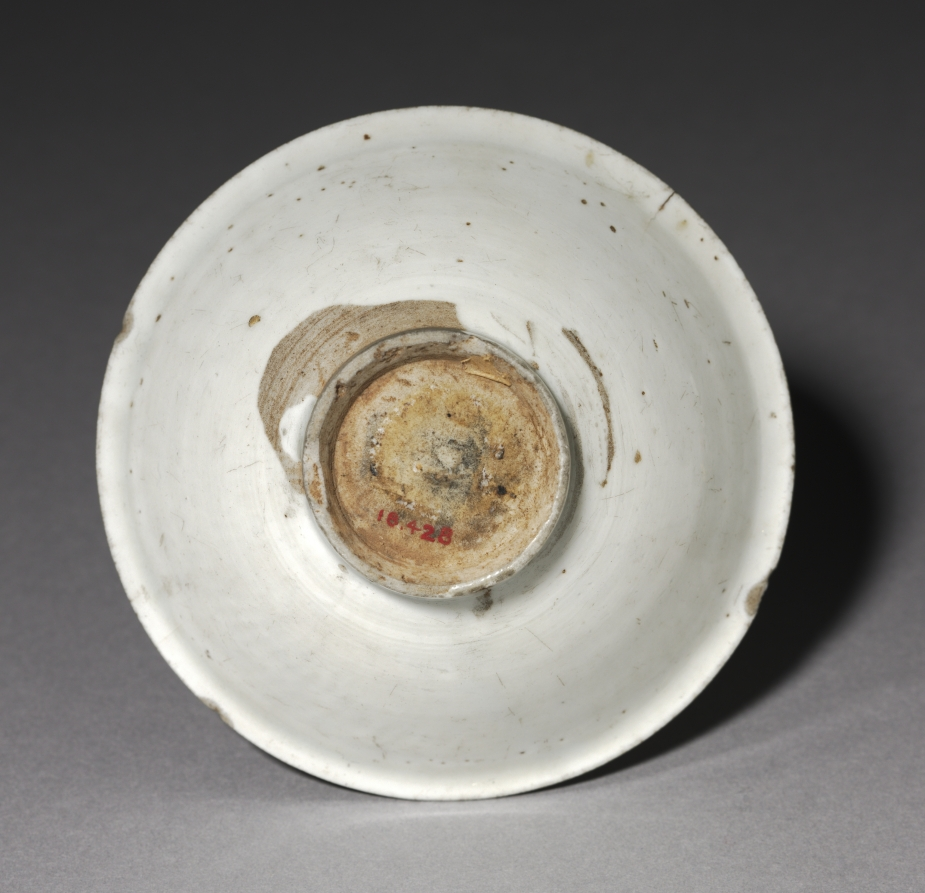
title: Bowl with Carved Design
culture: Korea, Goryeo dynasty (918–1392)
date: 1000s–1100s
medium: pottery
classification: Ceramic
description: As early as the seventh century, the practice of drinking tea and wine became an important part of elite leisure culture in Korea. A wide bowl like this example was especially suitable for drinking powdered tea shaved from a compressed tea cake, the most commonly enjoyed type during the Goryeo period.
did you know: This white bowl is highly likely to have served as a tea bowl.